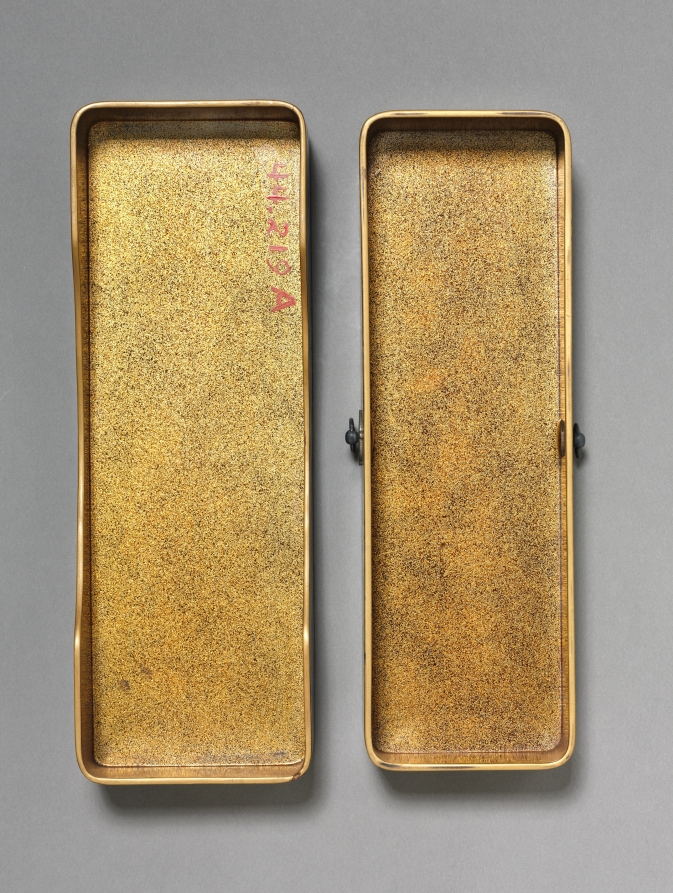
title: Letter Box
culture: Japan, Edo period (1615–1868)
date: 1615–1868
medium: lacquer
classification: Lacquer